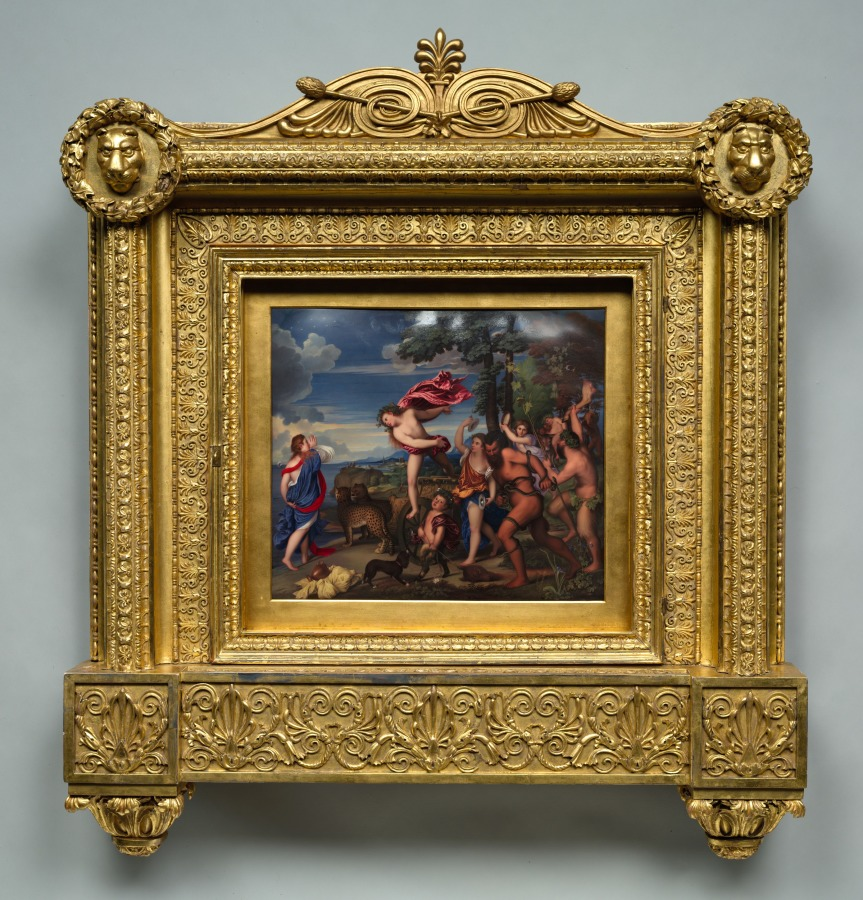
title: Bacchus and Ariadne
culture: England, 19th century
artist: Henry Bone (British, 1755–1834)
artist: after Titian (Italian, c. 1488–1576)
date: 1808–11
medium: enamel, in original gilt-wood and gesso carved frame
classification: Miniature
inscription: Signed and dated H Bone, 1811 on the recto (on the urn, lower left), inscribed on frame mat at bottom right: ENAMEL HBONE, and signed, dated and inscribed in full on the counter-enamel "painted by Henry Bone R.A. Enamel painter in Ordinary to His Majesty and Enamel painter to His Royal Highness the Prince of Wales, after the Original by Titian in the Collection of the Rt: Honble: Lord Kinnaird &c &c &c.____ This Picture the most celebrated amongst the Bacchanalian Subjects of Titian (when patronis'd by Alphonso Duke of Ferrara) was ultimately brought to this Country from the Villa Aldobrandini in Rome in 1806, from whence it was imported by Willm. Buchanan Esq.____ Size of the Original 6 feet 2 inches, by 5 ---- 10 ---- This Enamel picture w[as] began July 30th 1808 and finish'd March 1811. ___ (HB. Elected a Royal Academician Feby. 11th 1811)"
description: Henry Bone devoted three years to creating this work, a tremendous technical achievement and the largest enamel on copper that had ever been made. The painstaking process required each application of color to be fired at a different temperature in the kiln. The enamel exactly reproduces Titian’s Bacchus and Ariadne (now in the National Gallery, London), an early sixteenth-century Italian masterpiece that had recently come into an English collection. The elaborate carved and gilded wood frame was specially designed for the work, an indication of the cultural value placed on great enamel reproductions of famous paintings. Bone was unable to show his masterwork at the annual Royal Academy exhibition in 1811 because the Prince of Wales had asked to see it. When the prince decided not to purchase it, Bone issued more than 4,000 tickets for visitors to view the work in his studio.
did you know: Henry Bone was known for his enamel paintings created through a laborious process of fusing painted glass to copper and firing at controlled temperatures.